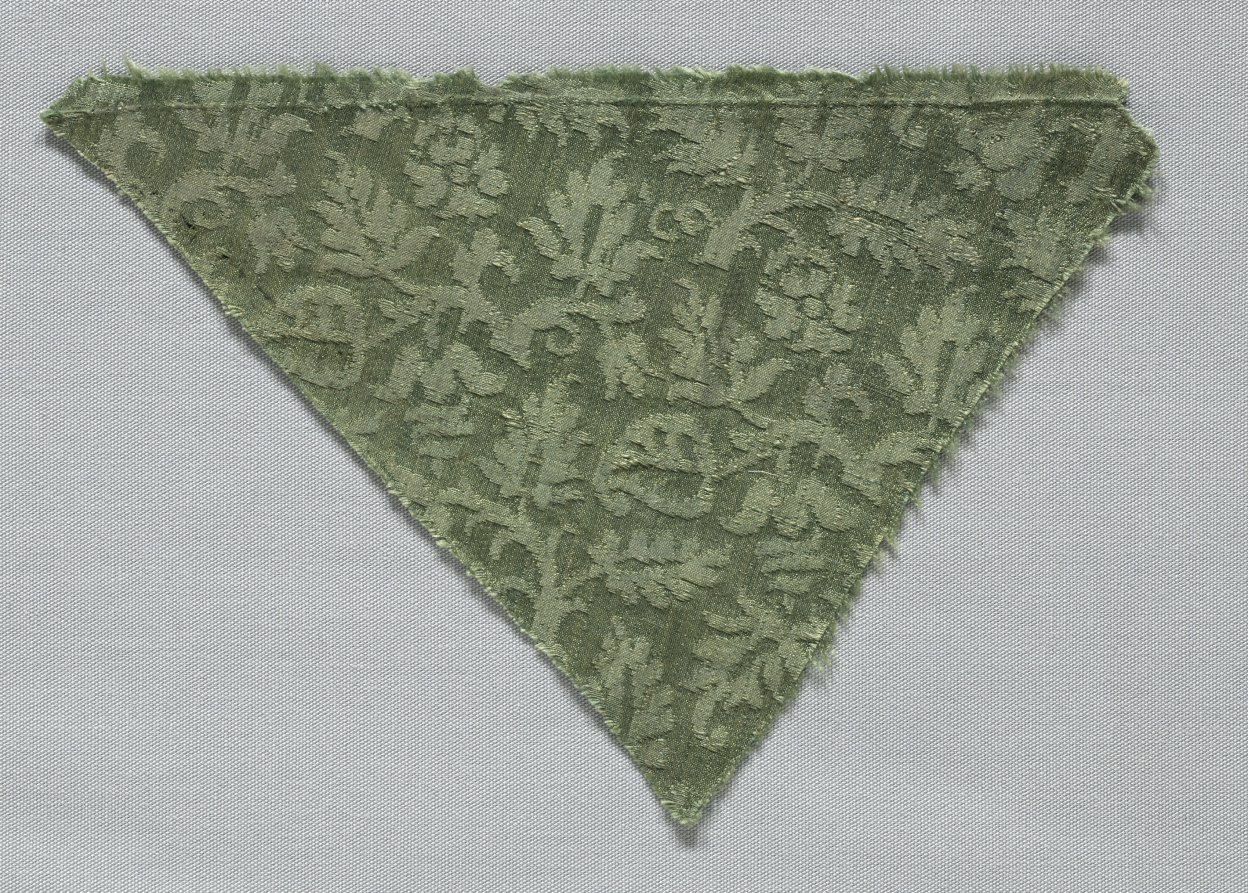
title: Silk Damask Fragment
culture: Italy, 16th century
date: 1500s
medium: damask, silk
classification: Textile